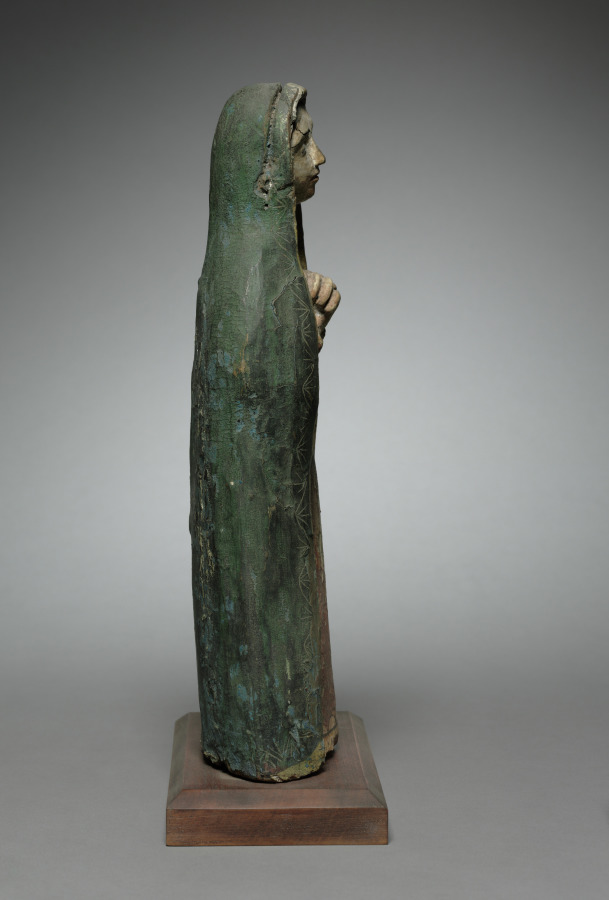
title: Our Lady of Sorrows: santo de bulto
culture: America, New Mexico, 17th-18th century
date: 1600s-1700s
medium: painted wood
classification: Sculpture